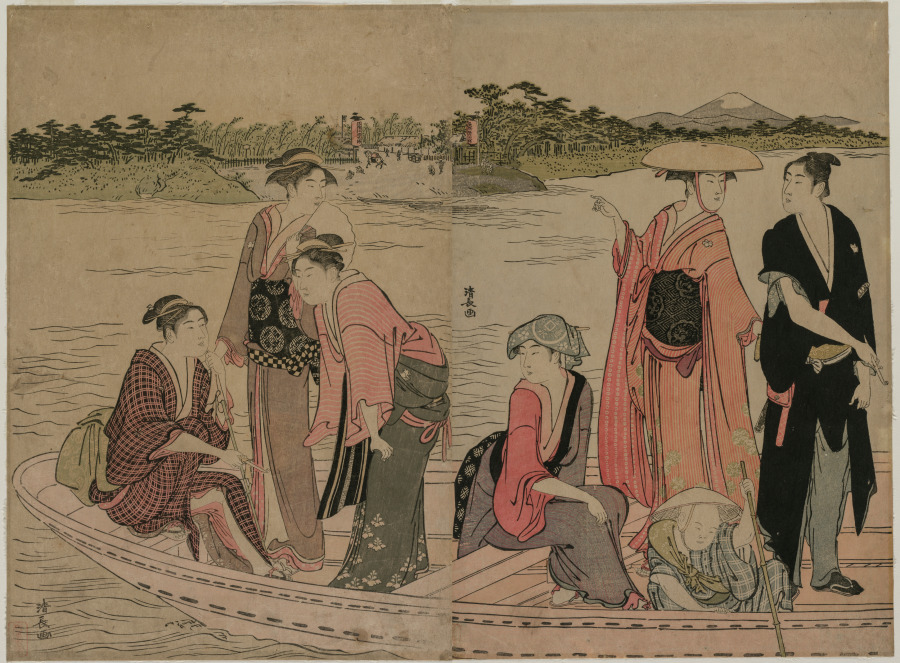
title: Passengers in a Ferry Boat on the Sumida River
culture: Japan, Edo period (1615–1868)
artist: Torii Kiyonaga (Japanese, 1752–1815)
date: 1784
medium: color woodblock print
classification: Print